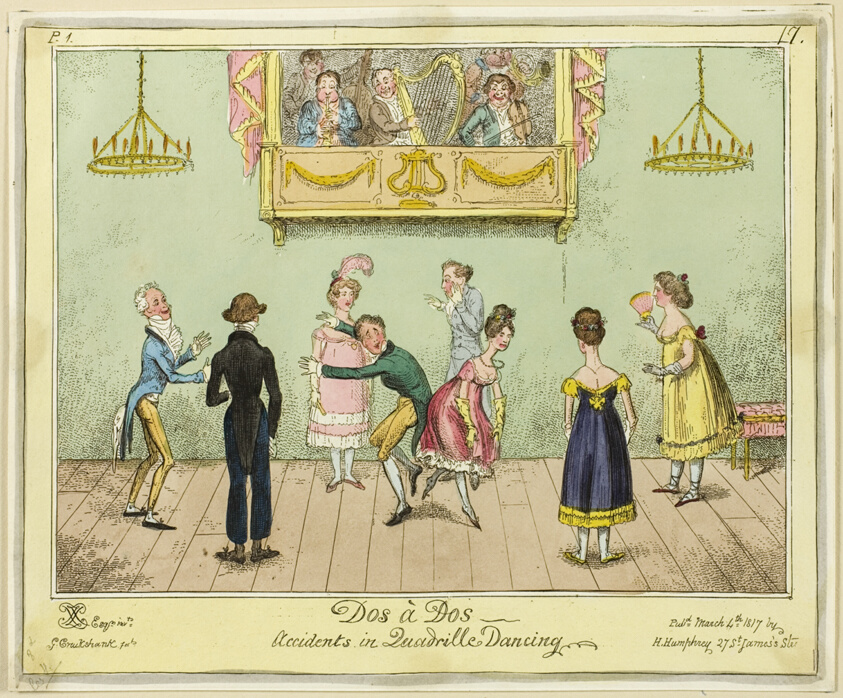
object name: Print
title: Dos-a-dos - Accidents in Quadrille Dancing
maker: George Cruikshank (English, 1792-1878); published by Hannah Humphrey (English, c. 1745-1818)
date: published March 4, 1817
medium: Hand-colored etching on paper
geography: England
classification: etching; print; prints and drawing